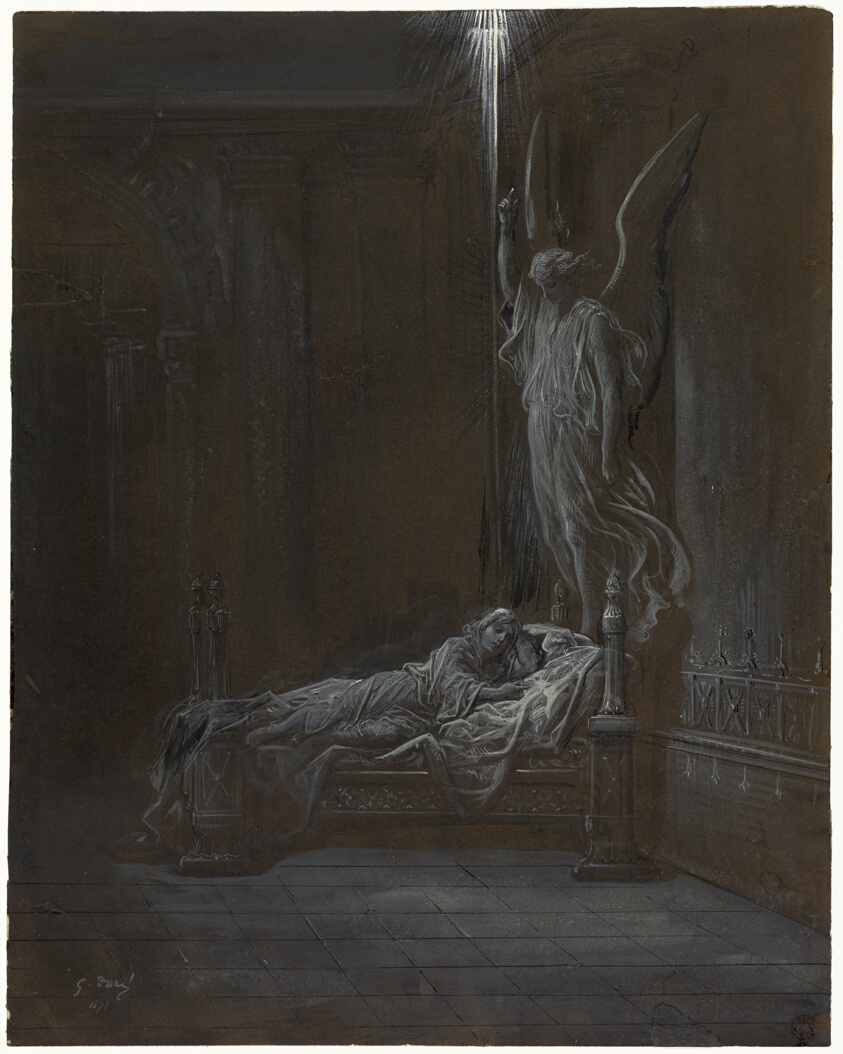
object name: Drawing and Watercolor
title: The Calling of Samuel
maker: Gustave Doré (French, 1832-1883)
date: 1877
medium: Brush and brown wash and white gouache, with pen and black ink, on tan wove paper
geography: France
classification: gouache; drawings (visual works); prints and drawing